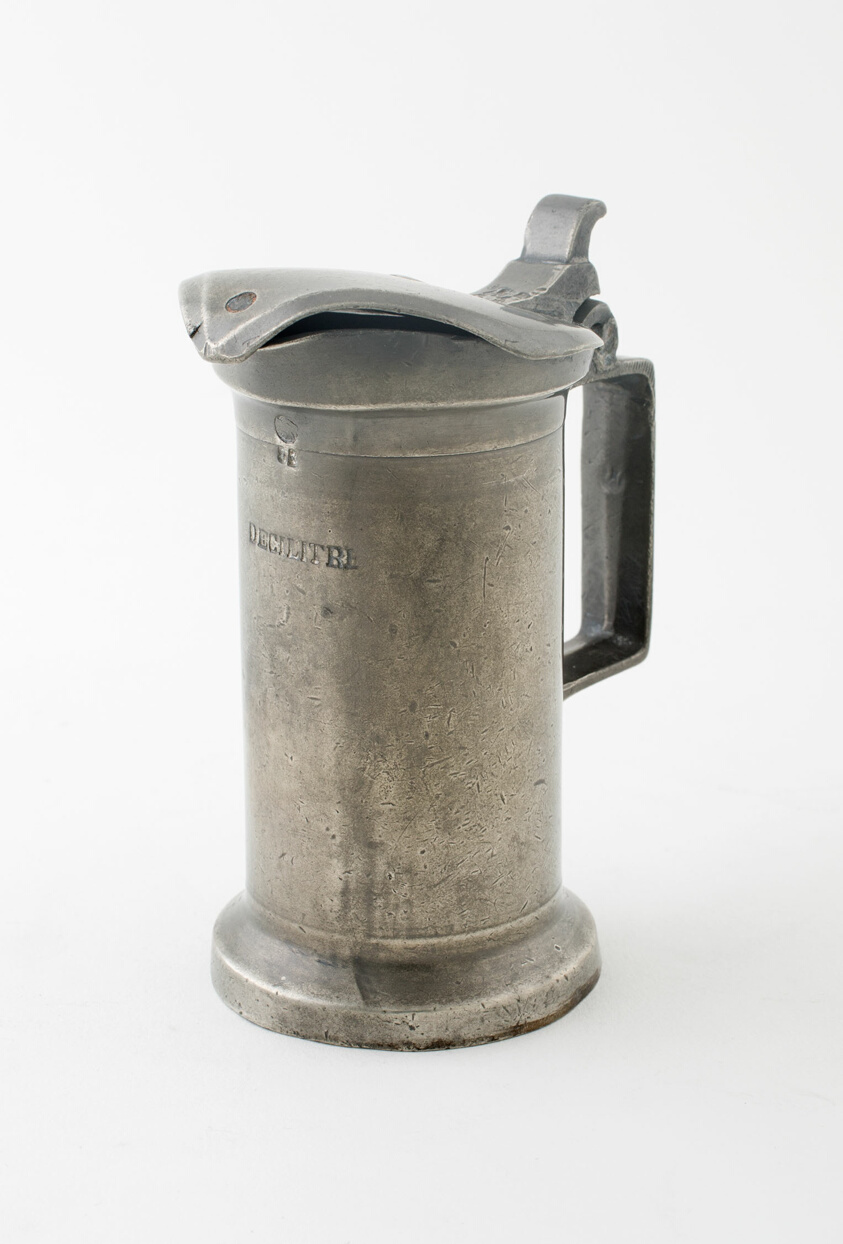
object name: Metalwork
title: Decilitre Measure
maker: Maison Le Seigneur; Deverre; Caen, France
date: 1875/1895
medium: Pewter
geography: Caen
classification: pewter; metalwork; european decorative arts